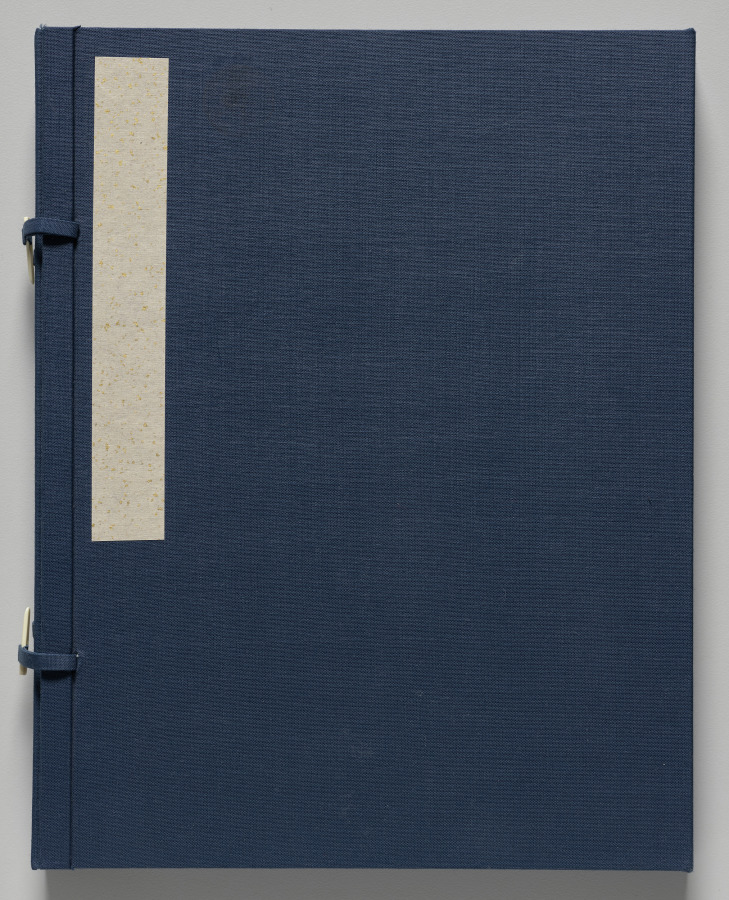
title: The Kōrin Picture Book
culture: Japan, Edo period (1615–1868)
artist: Nakamura Hōchū (Japanese, d. 1819)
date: 1800s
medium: Set of two woodblock printed folding-books; ink and color on paper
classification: Bound Volume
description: Nakamura Hōchū prized the design acumen of earlier painter Ogata Kōrin (1658–1716) and honored him with this two-volume set of woodblock printed images. While Hōchū sampled the original compositions from Kōrin’s works, the prints in these books are heavily inflected with his own loose, whimsical drawing style.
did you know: This set of books is in the orihon, or folding-book format.